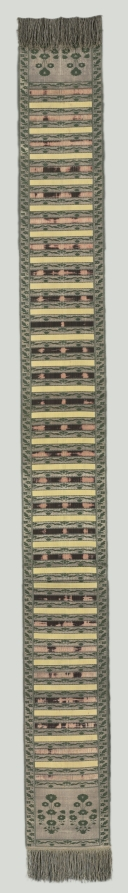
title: Sash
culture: Poland, 17th-18th century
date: 17th-18th century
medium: brocade; silk and metal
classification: Textile